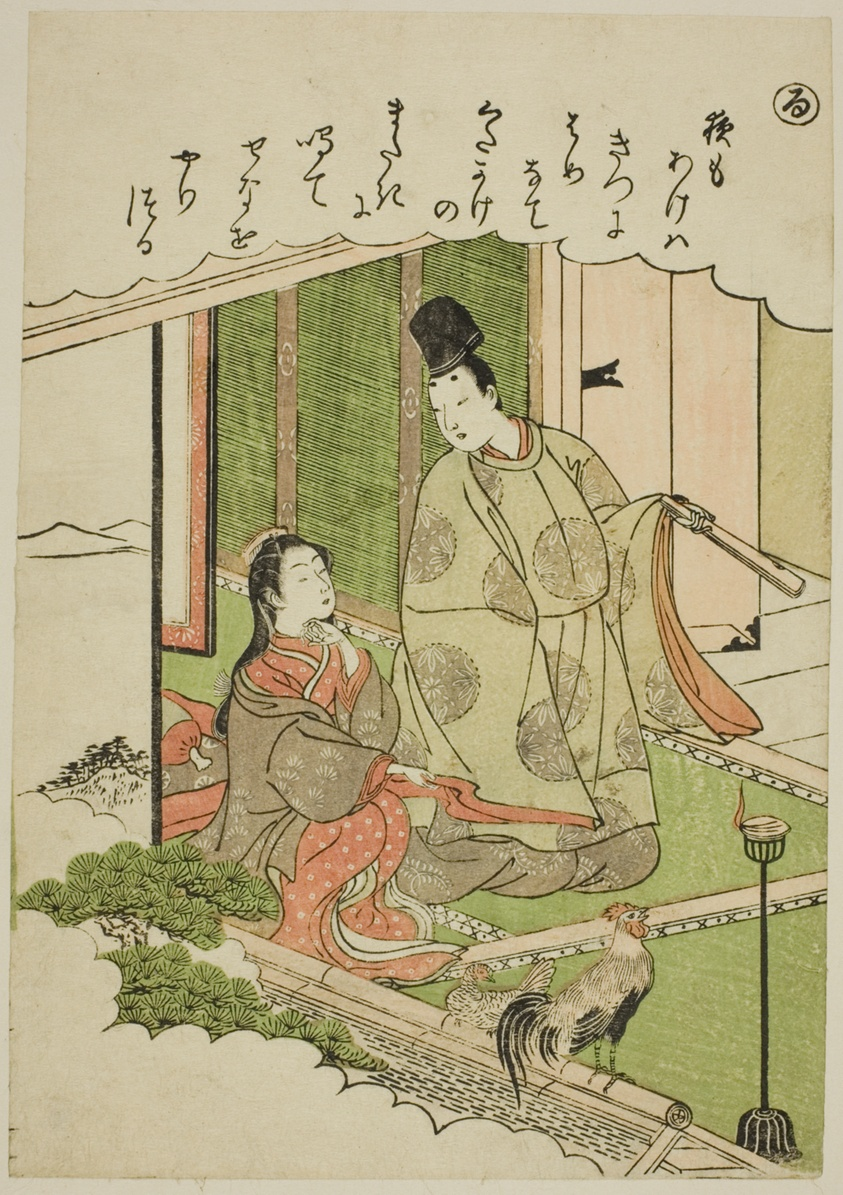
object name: Print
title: "Ru": Northern Province, from the series "Tales of Ise in Fashionable Brocade Pictures (Furyu nishiki-e Ise monogatari)"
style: Japanese (culture or style)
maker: Katsukawa Shunsho 勝川 春章; Japanese, 1726-1792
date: c. 1772/73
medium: Color woodblock print; koban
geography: Japan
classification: woodblock print; print; asian art